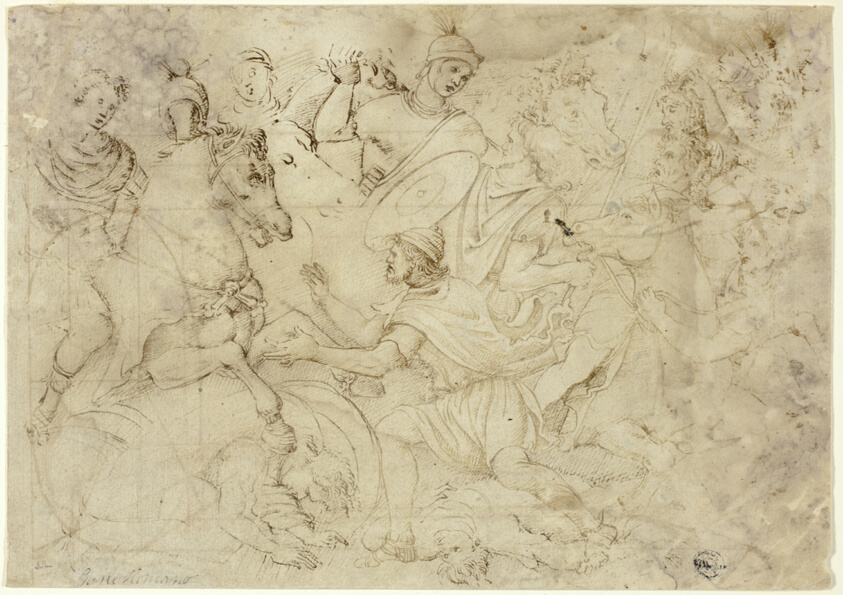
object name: Drawing and Watercolor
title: After the Antique: Trajan's Victorious Combat against the Dacians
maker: Unknown Artist; Italian, 16th century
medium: Pen and brown ink on ivory laid paper, laid down on buff laid paper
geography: Italy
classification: pen and ink drawings; drawings (visual works); prints and drawing